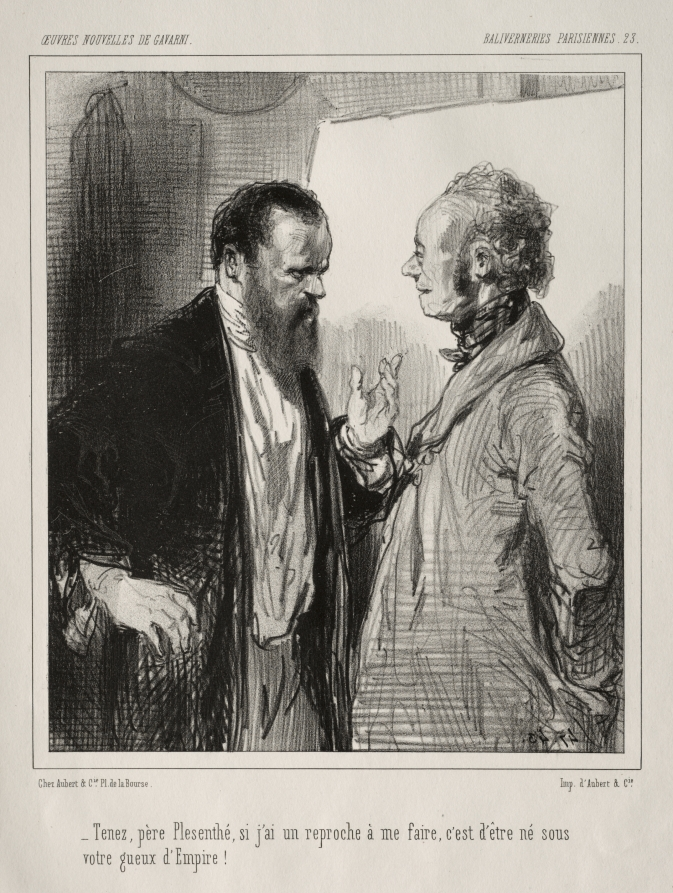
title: Baliverneries Parisiennes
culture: France, 19th century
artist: Paul Gavarni (French, 1804–1866)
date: c. 1847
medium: lithograph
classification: Print